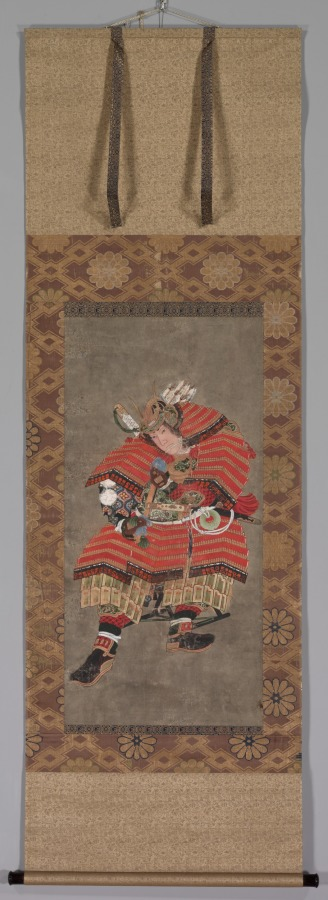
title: Minamoto no Yoshitsune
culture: Japan, Edo period (1615–1868)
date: 1800–1868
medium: hanging scroll; ink and color on paper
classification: Painting